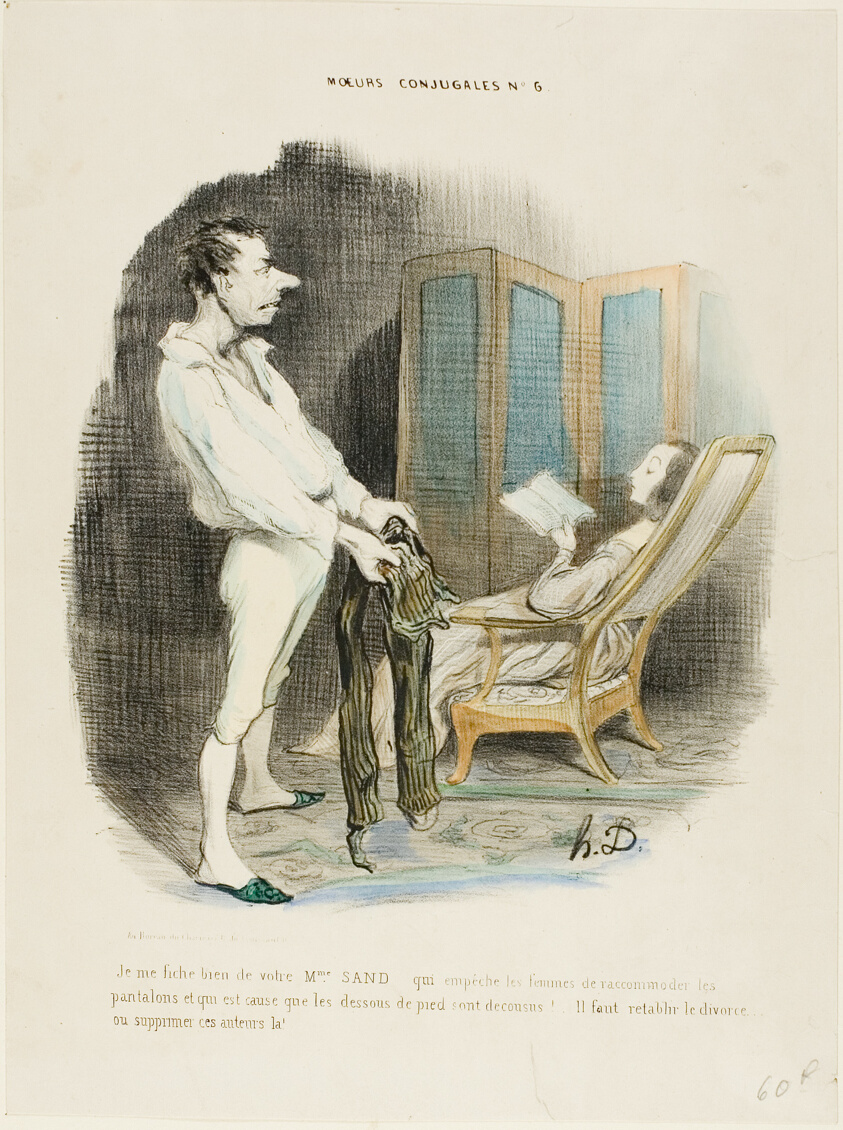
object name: Print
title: “I don't give a damn about your Miss Sand who prevents women from mending pants and darning socks! ... We must re-establish divorce or suppress those authors!,” plate 6 from Moeurs Conjugales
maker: Honoré Victorin Daumier; French, 1808-1879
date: 1839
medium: Lithograph in black, with handcoloring on white wove paper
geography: France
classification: lithograph; print; prints and drawing